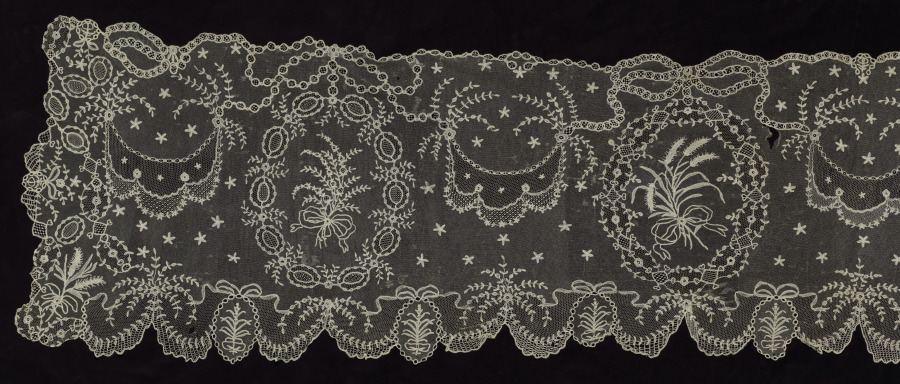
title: Lace Scarf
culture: Belgium, Brussels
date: 1750–99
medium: Bobbin lace (appliqué on net)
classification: Lace